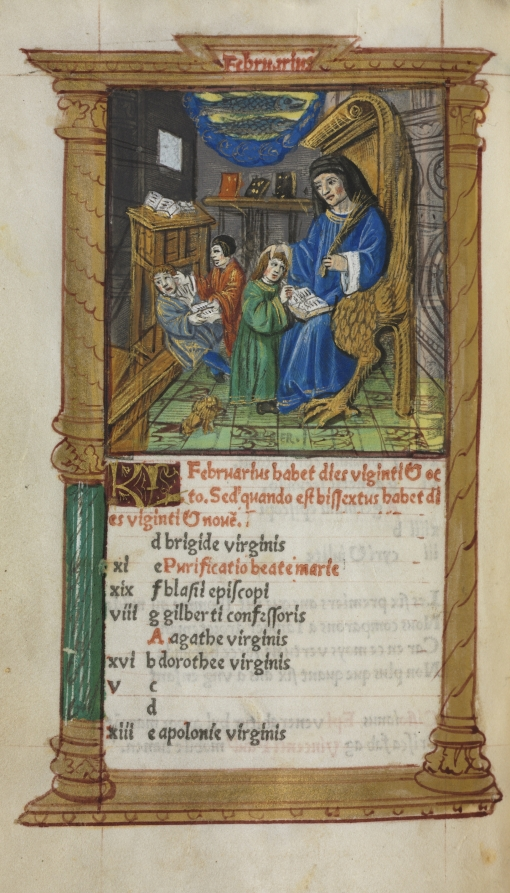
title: Printed Book of Hours (Use of Rome): fol.18r, St. Luke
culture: France, Paris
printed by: Guillaume Le Rouge (French, Paris, active 1493–1517)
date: 1510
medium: 112 Printed folios on parchment, bound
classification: Bound Volume